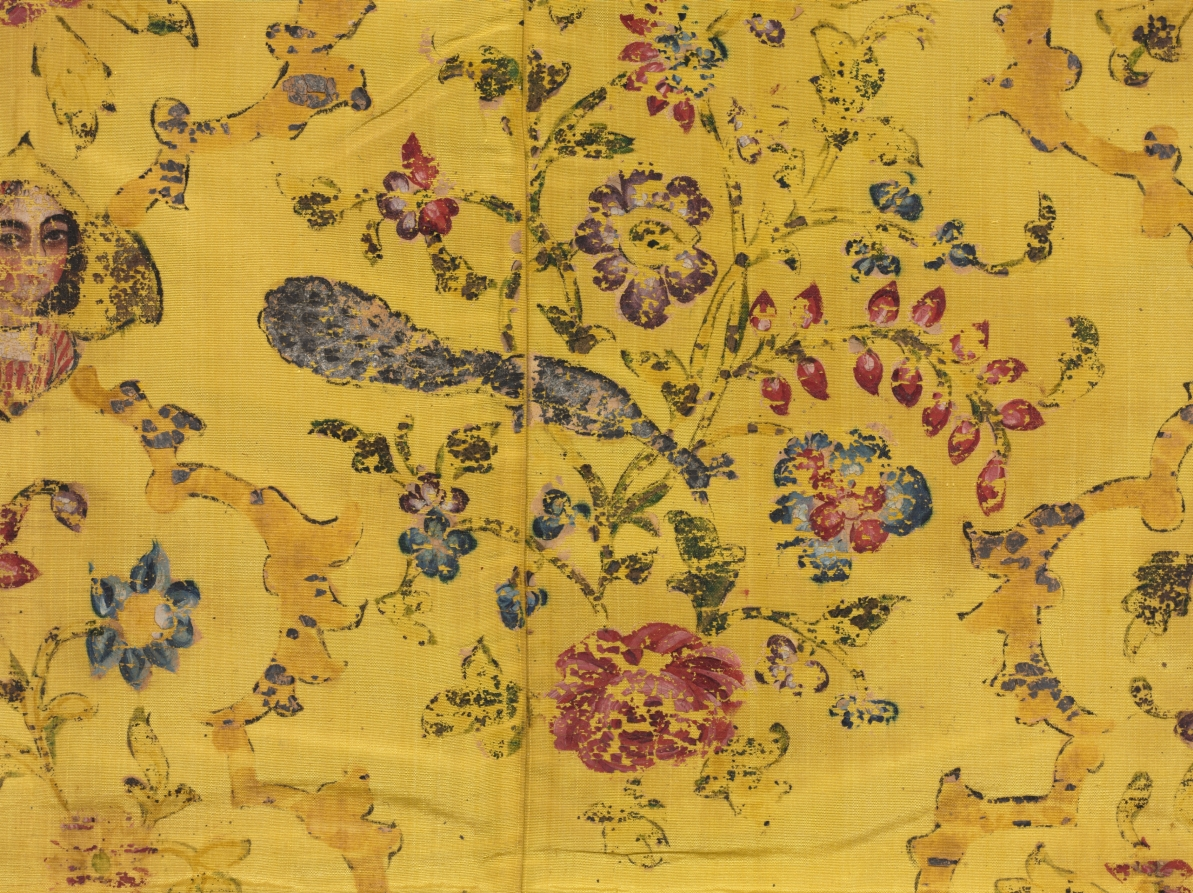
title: Wall cover with flora, peacocks, and portrait medallions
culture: Iran, Qajar period (1779-1925)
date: 1800s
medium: taffeta, hand-painted, block-printed: silk and pigments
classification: Textile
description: The European fashion of installing Chinese export silks with painted decoration as luxurious wall coverings may have inspired this exceptional Iranian silk. European engravings, which had flooded the Iranian market by the 19th century, most likely inspired the pattern. This rare silk fabric with painted figural and foliate decoration may have been a luxurious wall covering in a palace or grand mansion in the city of Kashan where mural paintings display similar 19th-century designs. Glistening silver pigment originally formed the palmette-leaf compartment outlines (now mostly deep yellow) that display colorful blossoming plants enlivened with now tarnished silver peacocks. At their junctures, portrait medallions of Iranian princesses are distinctly Qajar in attire and style, as are the composite blossoming plants.